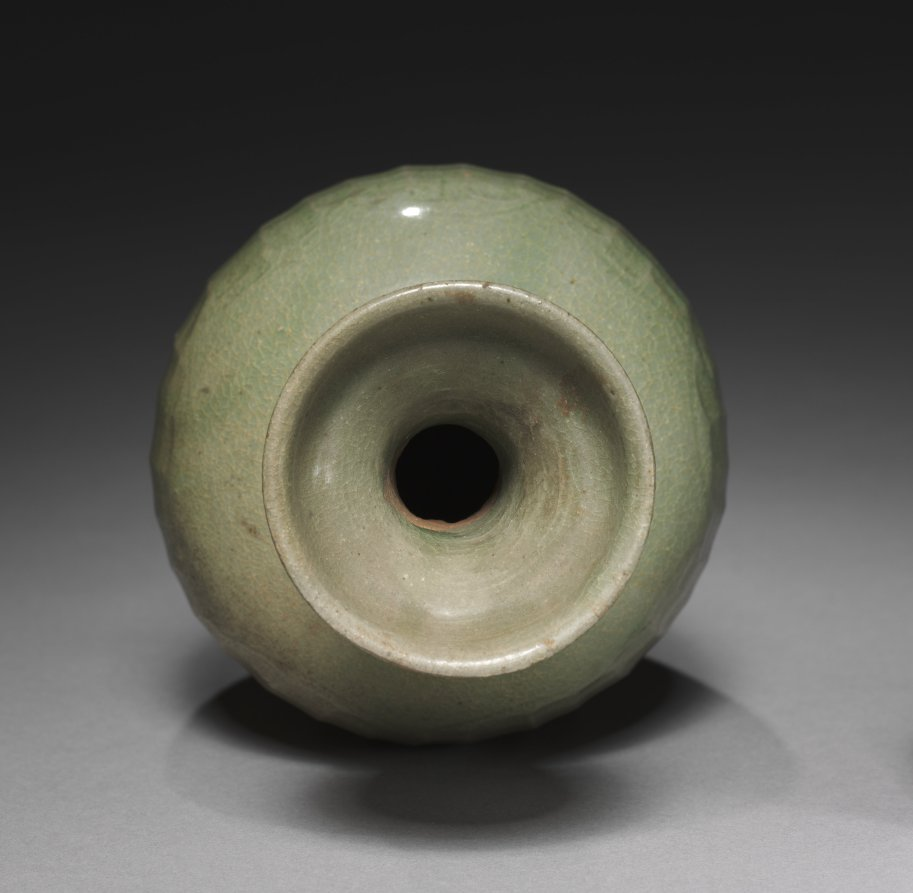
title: Wide-Mouthed Vase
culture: Korea, Goryeo dynasty (918–1392)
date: 1000s–1100s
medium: porcelaneous ware with celadon glaze and fluted and incised decoration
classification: Ceramic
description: As early as the seventh century, the practice of drinking tea and wine became an important part of elite culture in Korea. Elites of the Goryeo period commissioned a variety of types of utensils and vessels including this handsome wine bottle, to make their drinking experience more exciting.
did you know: The translucent greenish and bluish glaze of Goryeo celadons, shown in this vase, is the result of distinctive small and long Korean kilns, which maintained a low oxygen saturation with a high level of carbon dioxide.